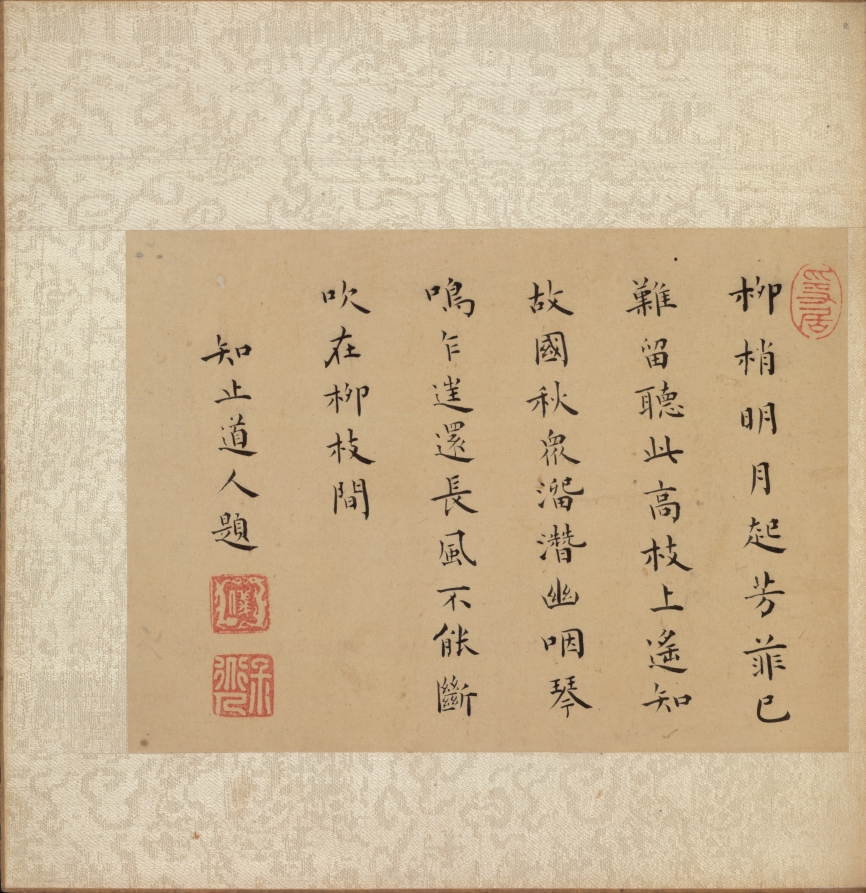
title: Album of Miscellaneous Subjects, Leaf 6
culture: China, Qing dynasty (1644-1911)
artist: Fan Qi (Chinese, 1616–after 1694)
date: early 1650s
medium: album leaf, ink and color on silk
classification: Painting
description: Zhou Yi's calligraphy is across from the painting on leaf six. His colophon reads: The bright moon emerges through the willow, The fragrance of flowers is already difficult to retain. Listening above these tall branches, I sense that faraway in my native place autumn has arrived. Obstructed, all the diminished waters flow, Abruptly the sound of a lute wafts to and fro. A strong wind, unabated, blows among the willow branches.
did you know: A cicada clings to a willow branch while two bees fly in the moonlight .